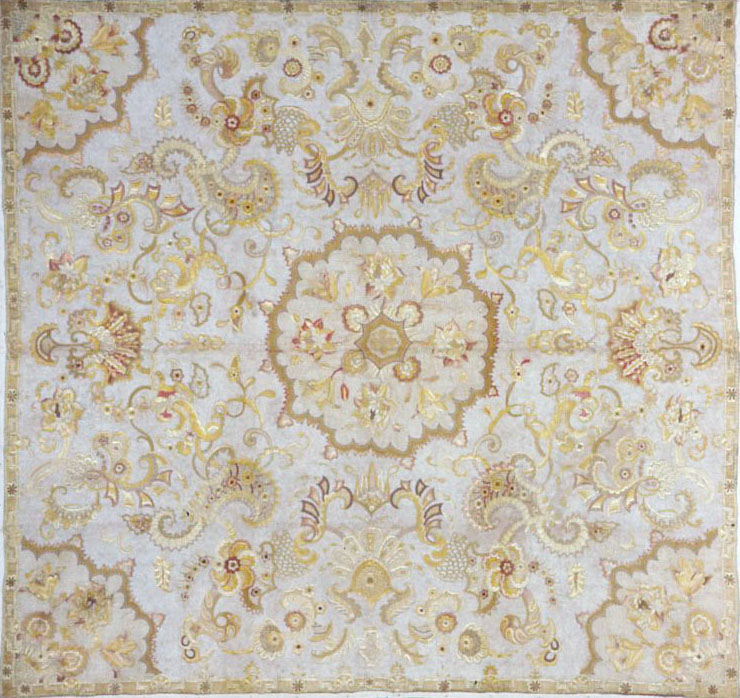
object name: Textile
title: Pillow Sham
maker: England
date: c.1720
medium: Cotton, plain weave, underlaid with linen, plain weave; embroidered with silk floss and silk yarns in back, herringbone, individual satin, and satin stitches; laid work, couching, and French knots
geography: England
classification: textile; needlework (visual works)